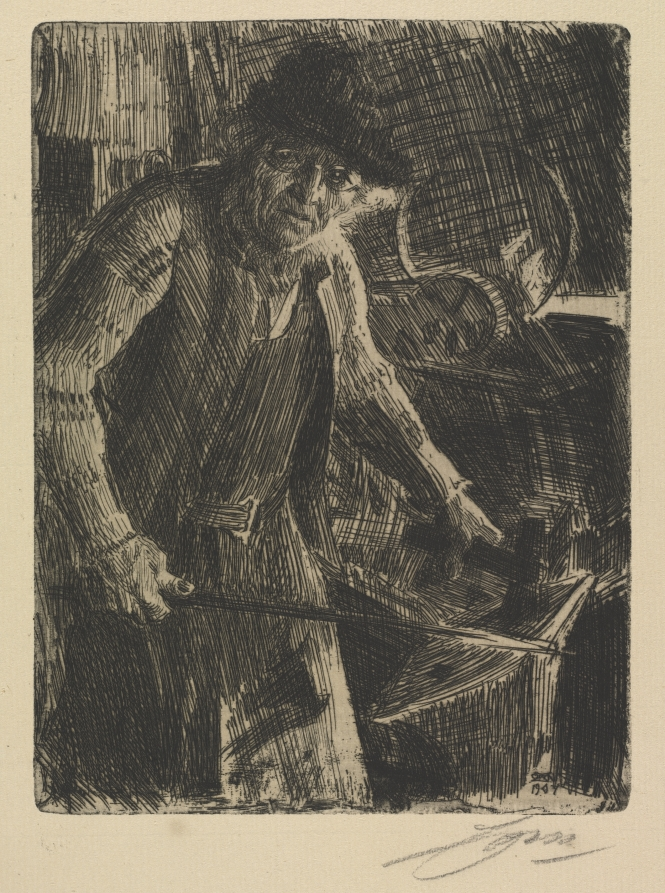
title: The Master-smith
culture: Sweden, 20th century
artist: Anders Zorn (Swedish, 1860–1920)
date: 1907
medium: etching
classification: Print